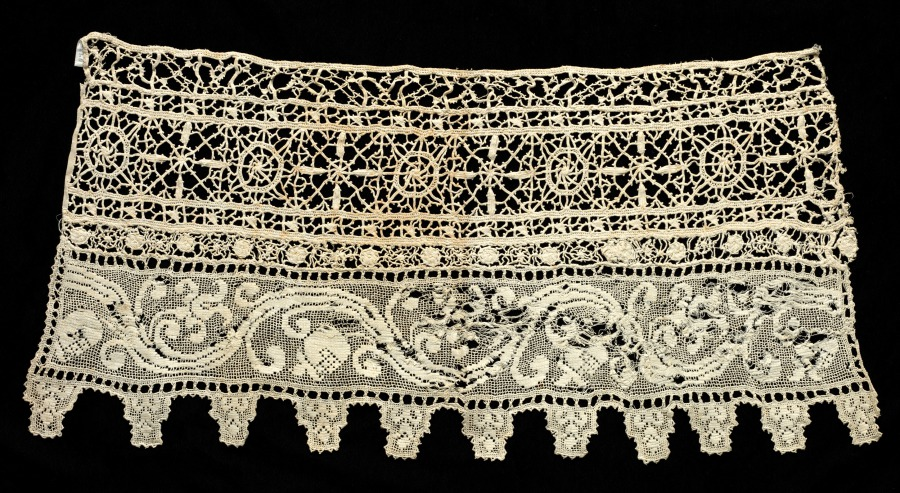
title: Fragment of a Border with Floral Vine and Geometric Patterns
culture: Italy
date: 1500s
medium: Bleached linen (est.): needle lace, burato (twined ground and darned in two directions) and reticella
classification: Lace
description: Textiles often incorporate multiple techniques within a single piece, providing visual interest, and also demonstrating the skill and versatility of the maker. This fragment incorporates both reticella, a type of geometric needle lace worked on a grid of plaited or laid thread, and a border of burato.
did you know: Myrta Leonora Jones, the donor of this lace, was a women’s rights activist in Cleveland in the early 20th century.